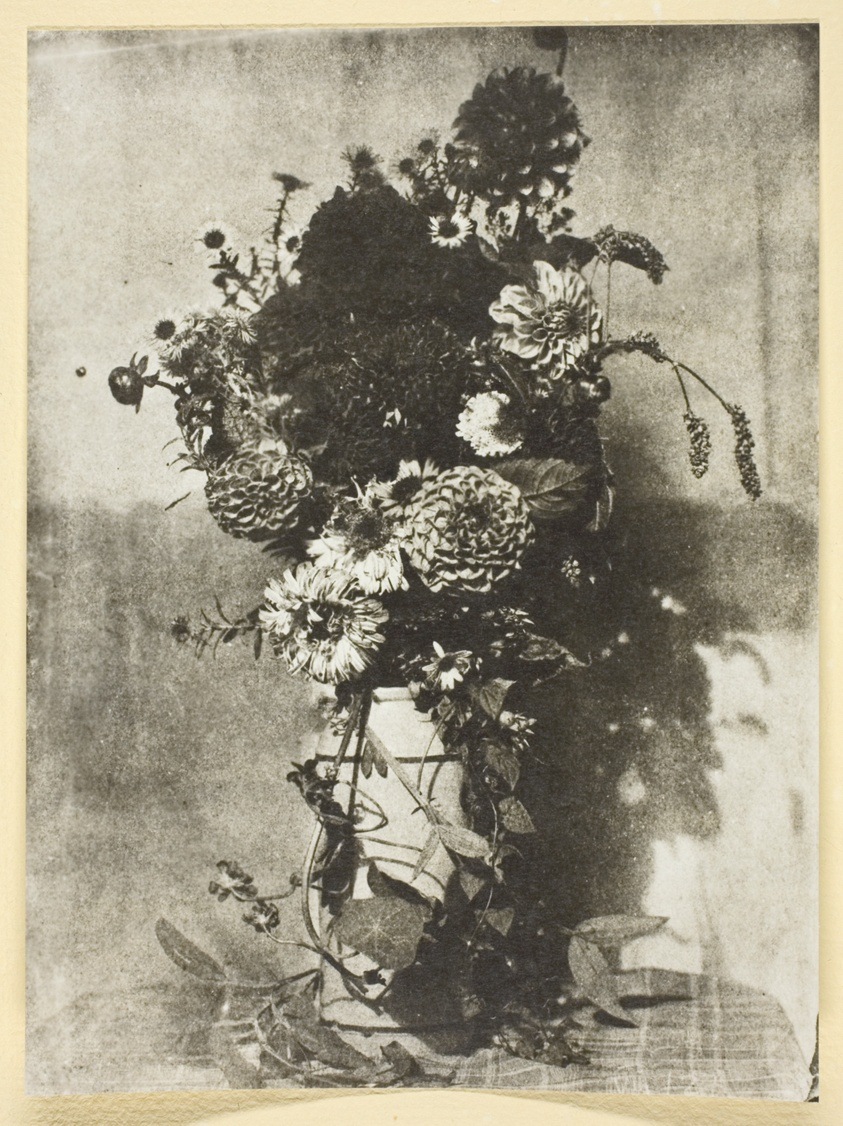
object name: Photograph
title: Bouquet de Fleurs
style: 19th century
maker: Hippolyte Bayard (French, 1801–1887)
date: 1842/50, printed 1965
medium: Gelatin silver print, No. 24 from the portfolio "Bayard: XXV Calotypes, 1842-1850" (1965)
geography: France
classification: photographic process; photography; photograph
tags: Collected by Hugh Edwards